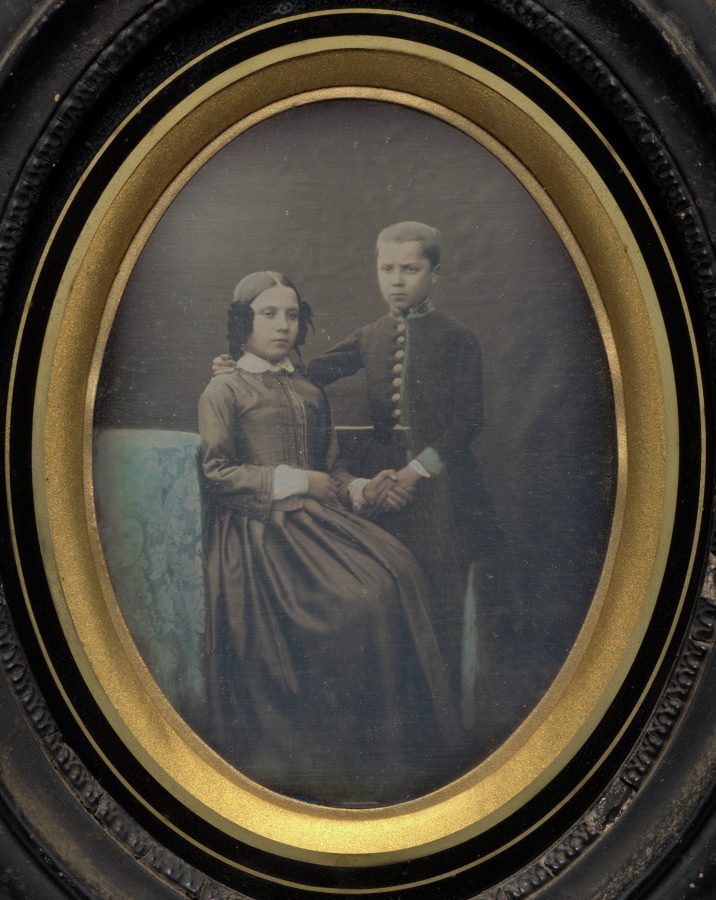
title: Brother and sister clasping hands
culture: France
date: c. 1860–65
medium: daguerreotype, half-plate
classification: Photograph